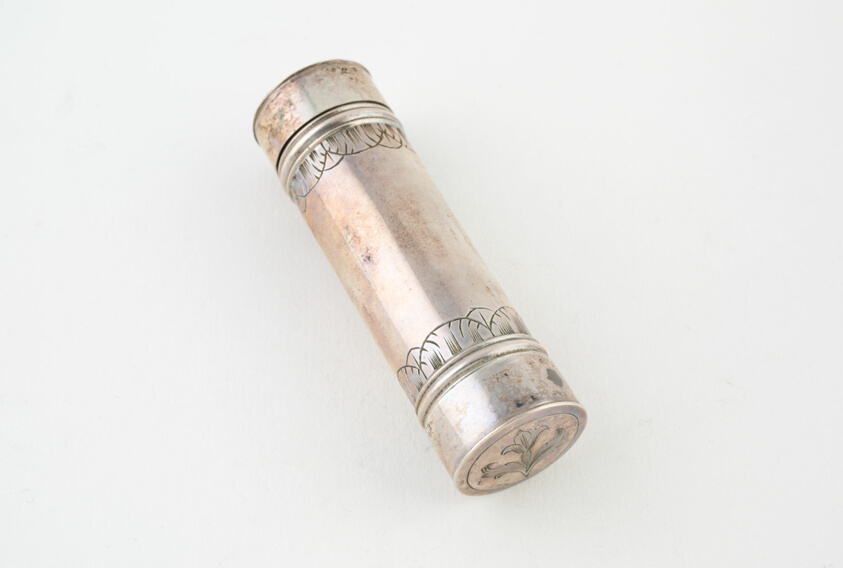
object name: Metalwork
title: Nutmeg Grater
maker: Possibly Denmark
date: c. 1820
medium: Silver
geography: Denmark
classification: container for personal use; box; european decorative arts; metalwork; silver; decorative object/ornament